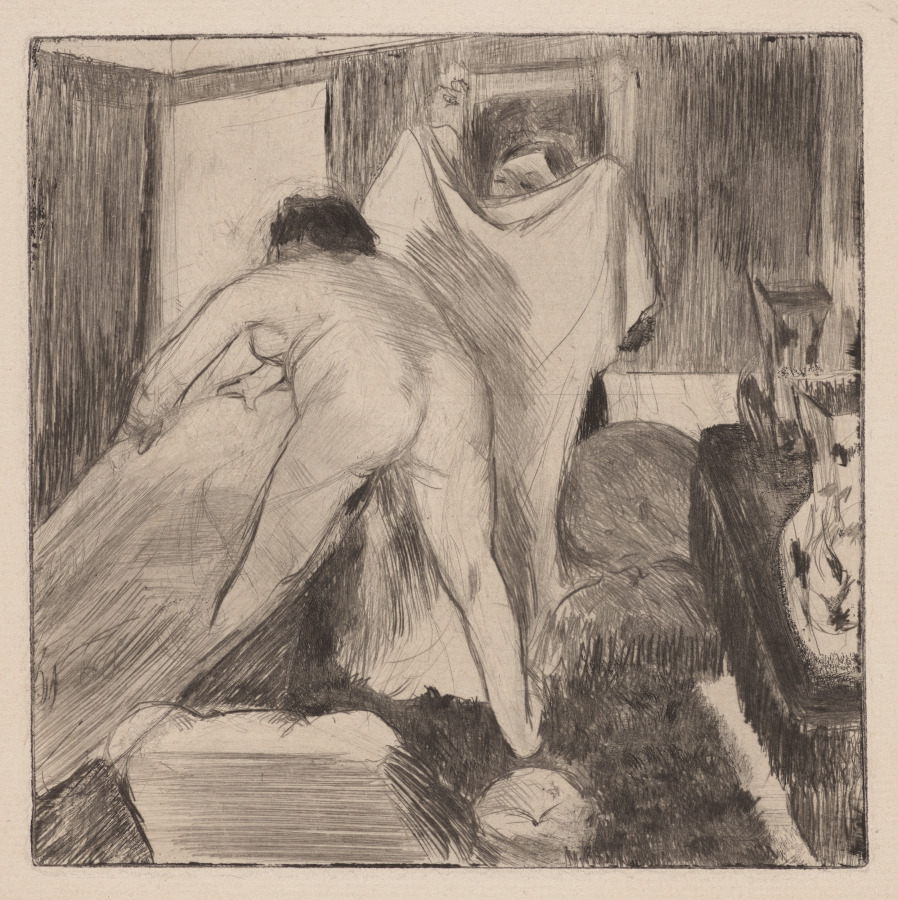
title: Leaving the Bath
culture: France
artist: Edgar Degas (French, 1834–1917)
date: 1879–80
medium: drypoint, aquatint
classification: Print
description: In Leaving the Bath, a woman is seen from behind as she awkwardly grips a tub while cautiously stepping out of it. Nearby, a maid is mostly obscured by a cloth meant to dry and warm her. Their sketchlike surroundings communicate intimacy and privacy and, in what would become a characteristic aspect of his bather imagery, Edgar Degas places the viewer in a voyeuristic perspective, with the two women unaware of our presence. The artist began to explore etching in the 1850s, registering in the print department of Paris’s Bibliothèque Nationale so that he could closely study the works of past masters such as Rembrandt van Rijn. Degas saw prints as having an important part to play in the Impressionists’ group exhibitions and displayed them alongside paintings there.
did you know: Edgar Degas created this print by drawing on a copper plate, not with a traditional etching needle, but with a copper rod—a component of early electric lamps. This nontraditional tool produced an effect that Degas appreciated, and he experimented further after bringing the plate home by working on it with materials ranging from an emery pencil to a stone.